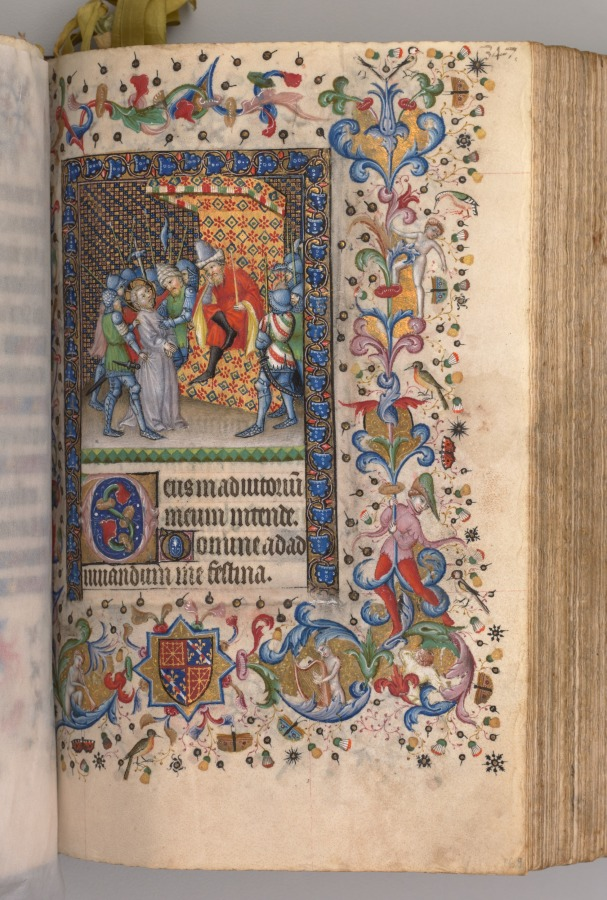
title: Hours of Charles the Noble, King of Navarre (1361-1425): fol. 169r, Christ Before Pilate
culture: France, Paris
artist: Master of the Brussels Initials and Associates (French)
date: c. 1405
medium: ink, tempera, and gold on vellum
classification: Bound Volume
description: This precious volume was obviously highly prized by its owner, the French-born King of Navarre, who had his coat of arms painted on no less than twenty folios. Rather than directly commissioning this manuscript from a specific workshop, it seems that Charles the Noble acquired his book of hours -- perhaps ready-made for the luxury market -- while on a trip to Paris in 1404-05. A collaborative effort, six painting styles are evidenced within the pages of this codex, those of two Italians, two Frenchmen, and two Netherlanders. The painter who was responsible for the planning and decoration of the book, and who produced seventeen of the large miniatures, was a Bolognese artist known as the Master of the Brussels Initials. His principal assistant, responsible for most of the borders, was a Florentine who signed his name "Zecho" da Firenze on folio 208 verso.